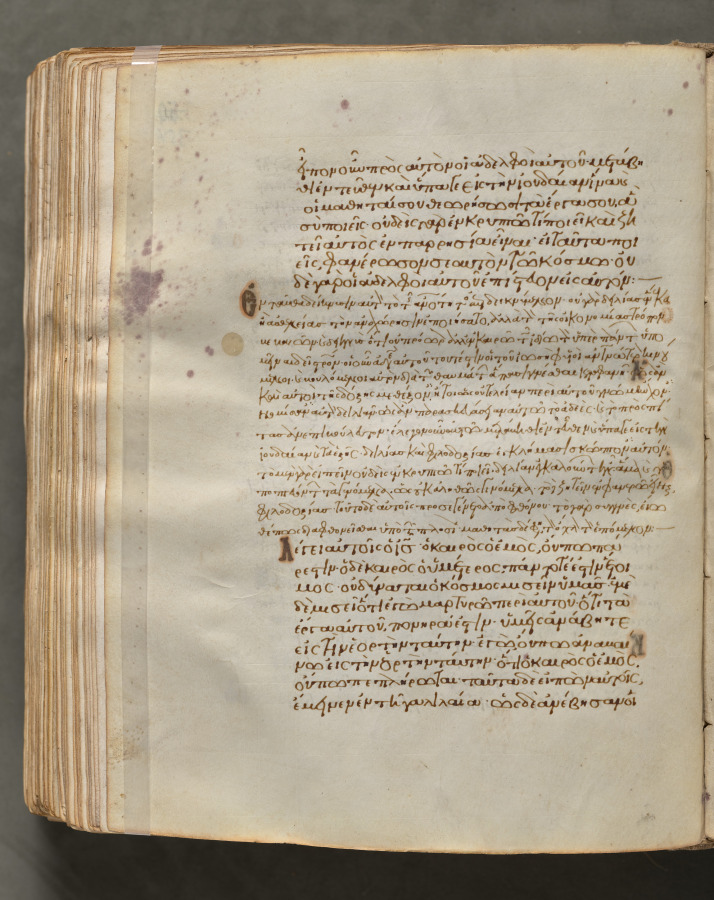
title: Text, folio 356 (verso), from a Gospel Book with Commentaries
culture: Byzantium, Constantinople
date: c. 1000–1100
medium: ink, tempera, and gold on vellum; leather binding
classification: Bound Volume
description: Each of the four gospels in this book opens on a page with brilliantly illuminated borders depicting the author of the text as well as birds—principally peacocks, symbols of the immortality of the soul—and fountains, representing the fountain of life and the salvation of the soul. This volume consists of 428 leaves with texts in Greek. Its level of sophistication suggests that it was probably written and decorated in a monastery in Constantinople.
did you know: Gospel books were carried in procession through Byzantine churches.